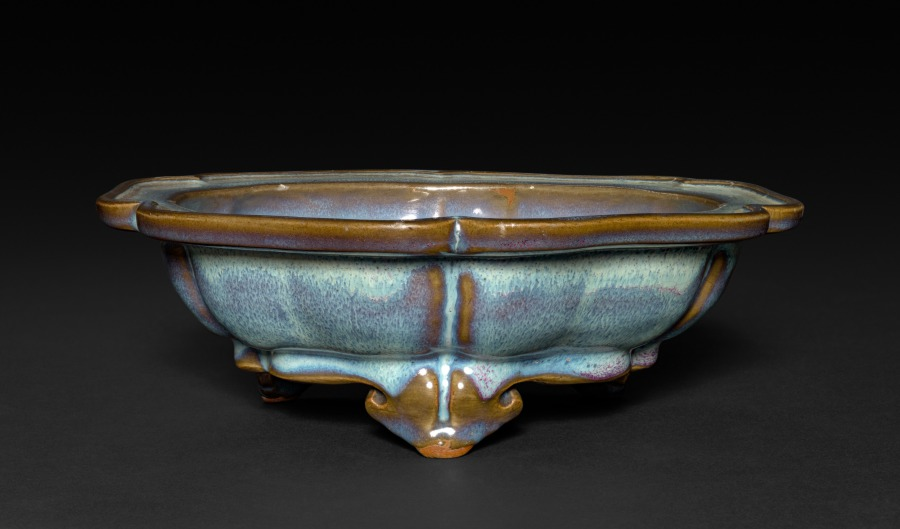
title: Flower Pot Stand or Bulb Bowl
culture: China, possibly Henan province, Yuan dynasty (1271-1368) - Ming dynasty (1368-1644)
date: 1300s–1400s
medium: glazed gray stoneware, Jun ware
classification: Ceramic